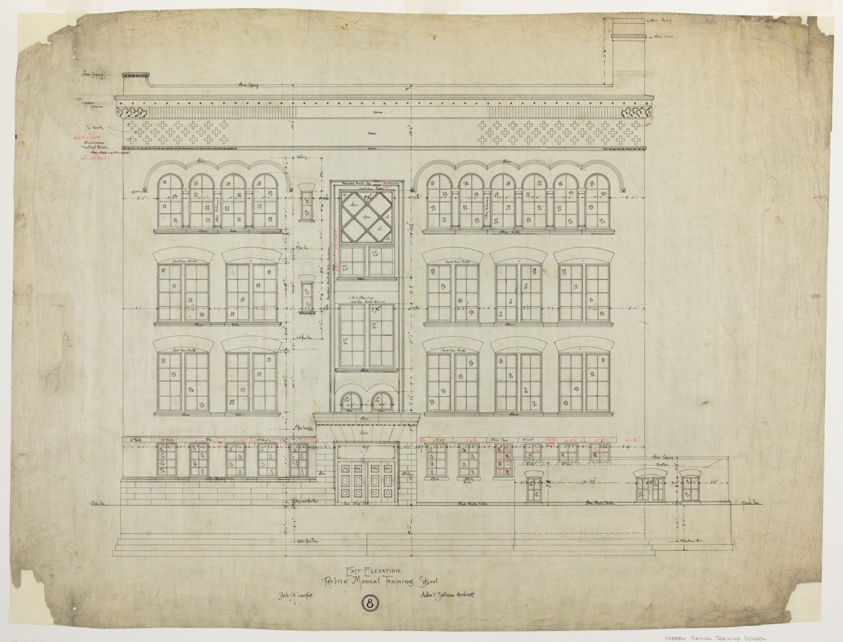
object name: Architectural Drawing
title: Hebrew Manual Training School, Chicago, Illinois, East Elevation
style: 19th century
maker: Adler and Sullivan; American, 1883-1895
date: 1889/90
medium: Black ink on linen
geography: 12th Place, 554 West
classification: architectural drawing; architecture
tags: schools, Judaism, elevation, Chicago